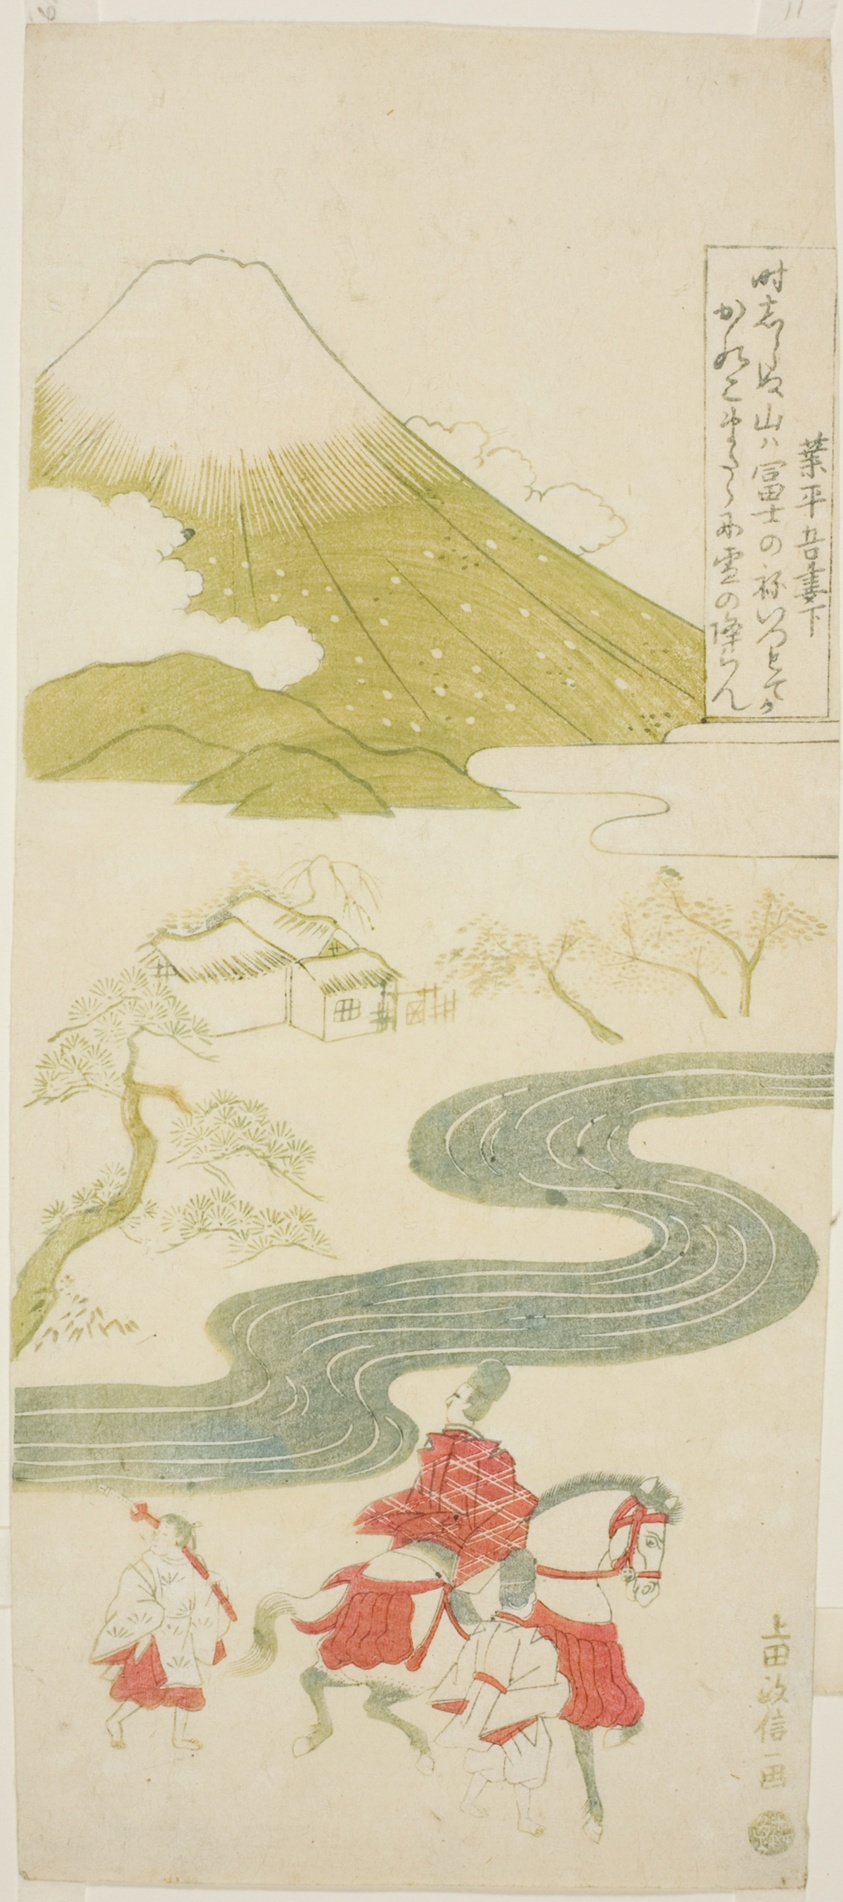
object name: Print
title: Narihira's Journey to the East 業平東下り (Narihira azuma kudari)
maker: Ueda, Masanobu; Japanese, 18th Cen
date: about 1764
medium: Color woodblock print; hosoban, mizu-e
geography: Japan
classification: woodblock print; print; asian art